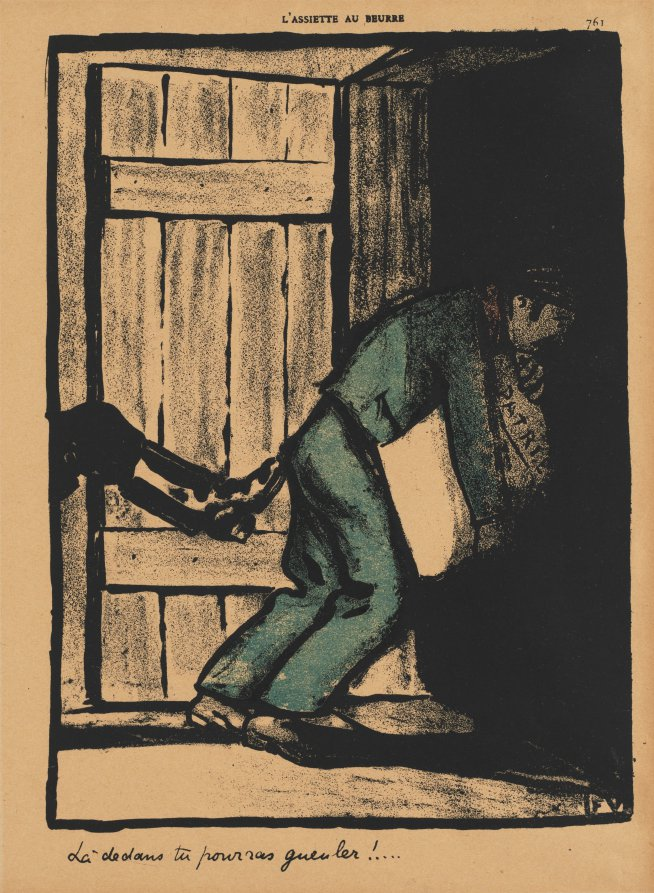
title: You can bawl...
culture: France, 19th century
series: Crimes and Punishments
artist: Félix Vallotton (Swiss French, 1865–1925)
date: 1901, published 1902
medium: color lithograph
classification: Print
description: This print was published in the magazine L’Assiette au Beurre (March 1, 1902 ) as plate 4 from the series Crimes and Punishments.